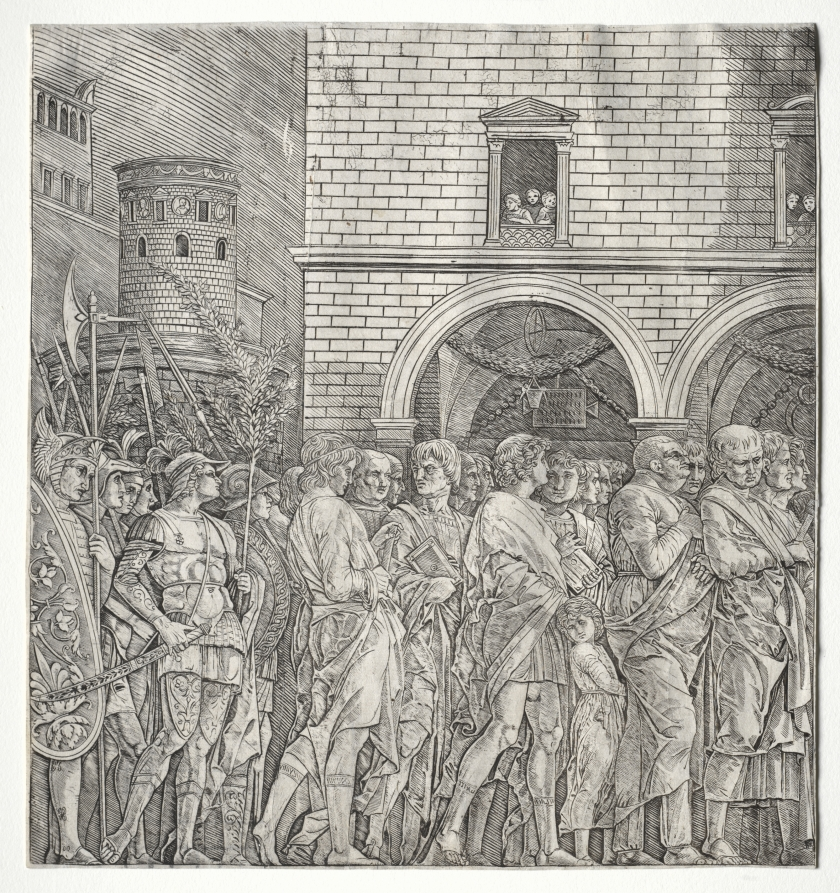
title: The Triumphs of Caesar: The Senators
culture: Italy, 15th century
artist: school of Andrea Mantegna (Italian, about 1431–1506)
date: 1400s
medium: engraving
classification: Print